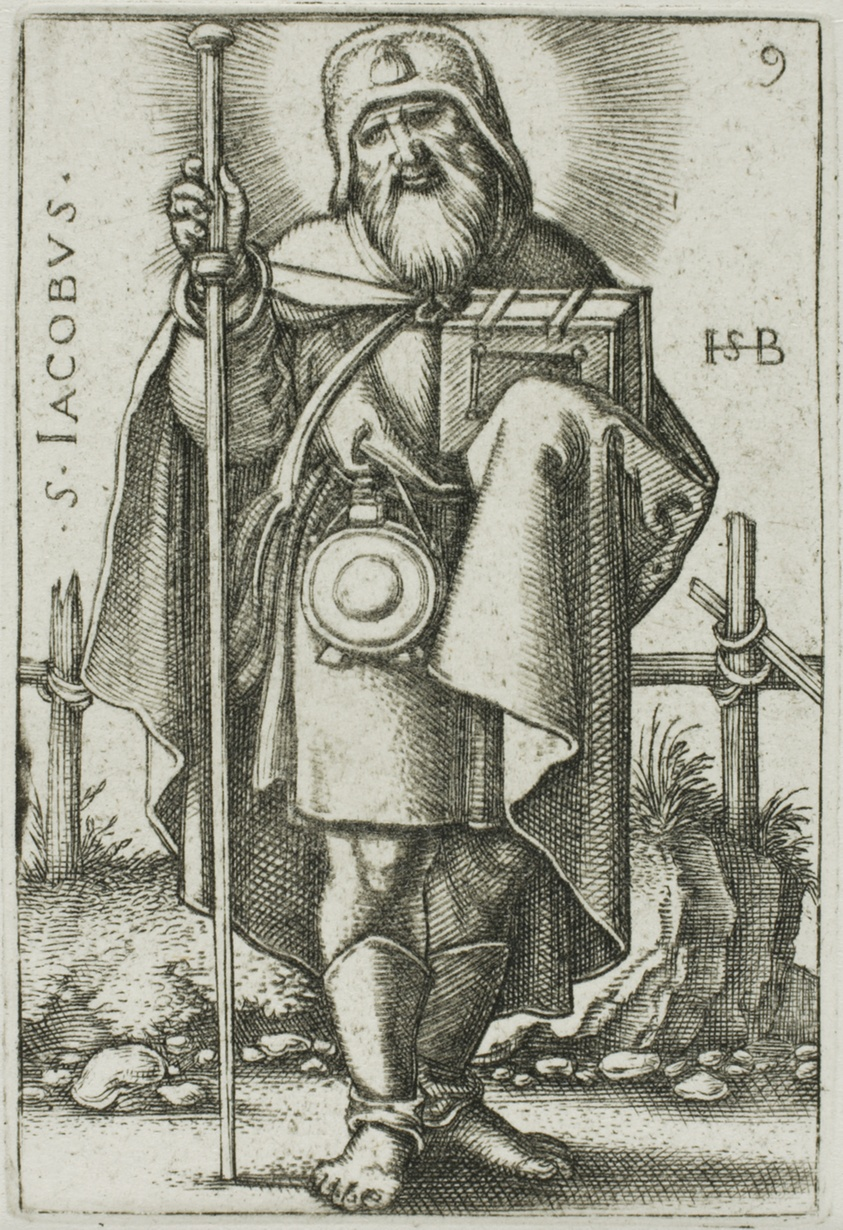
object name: Print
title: St. James Major, plate 9 from The Twelve Apostles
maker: Sebald Beham; German, 1500-1550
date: 1545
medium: Engraving in black on white wove paper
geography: Germany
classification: engraving; print; prints and drawing